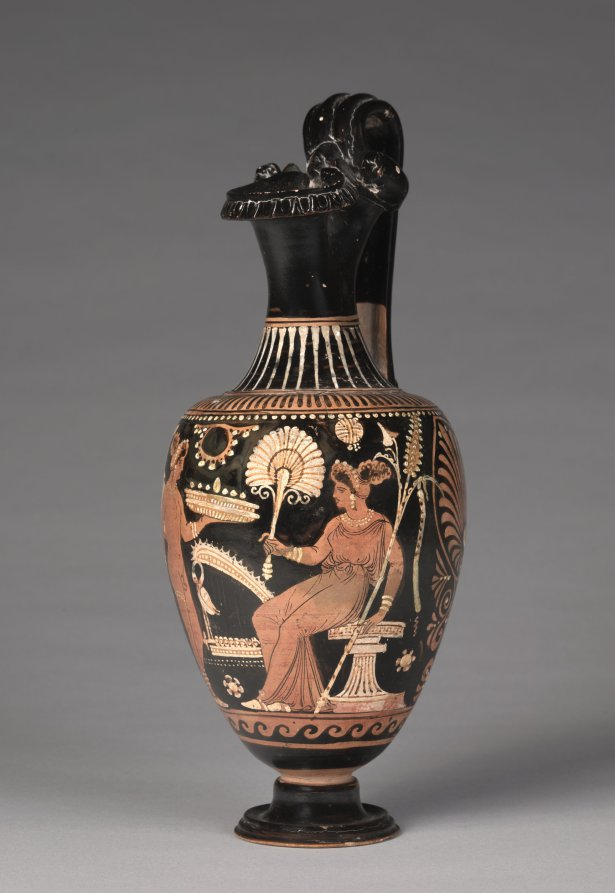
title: Red-Figure Oinochoe (Wine Jug): Eros and Woman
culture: South Italian, Apulian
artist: attributed to Cleveland Group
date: c. 340–320 BCE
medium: ceramic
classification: Ceramic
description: This wine jug provides the name for the Cleveland Group, comprising more than 20 similar vases decorated in the "Ornate" style of Apulian red-figure pottery. Close in style to the better known Darius Painter and the Patera and Ganymede Painters, many Cleveland Group vases feature very effeminate Eros figures like this one, here holding two phialai (libation bowls) and facing a woman before a harp.